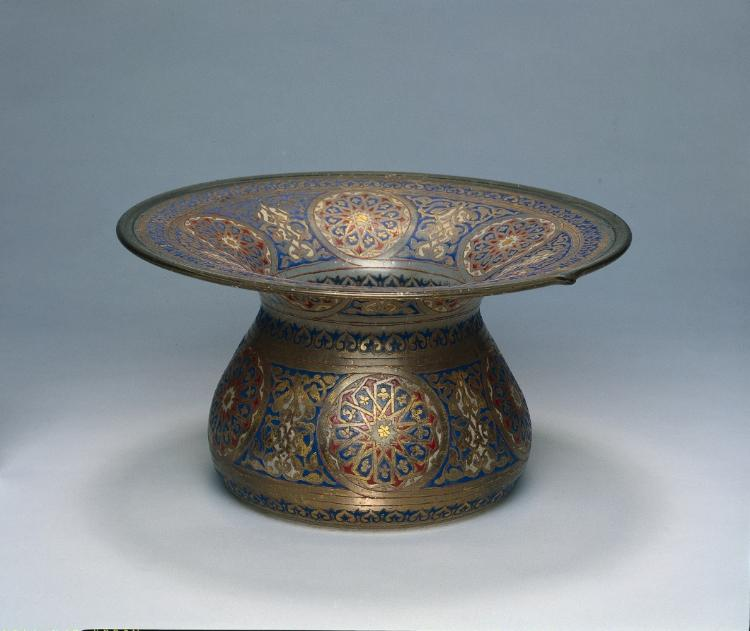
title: Ceremonial Spittoon or Basin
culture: Europe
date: late 1800s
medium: glass with enameled and gilded decoration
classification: Glass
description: This basin, as with the mosque lamp CMA 1981.10, is representative of reproductions of Mamluk glass that were prominent in the late 1800s in Europe during a period of resurgence of interest in Islamic art. At this time, collectors and artists revived the techniques of enameling and gilding that are hallmarks of Mamluk glass.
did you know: The intense enamel colors form striking star and leaf patterns.